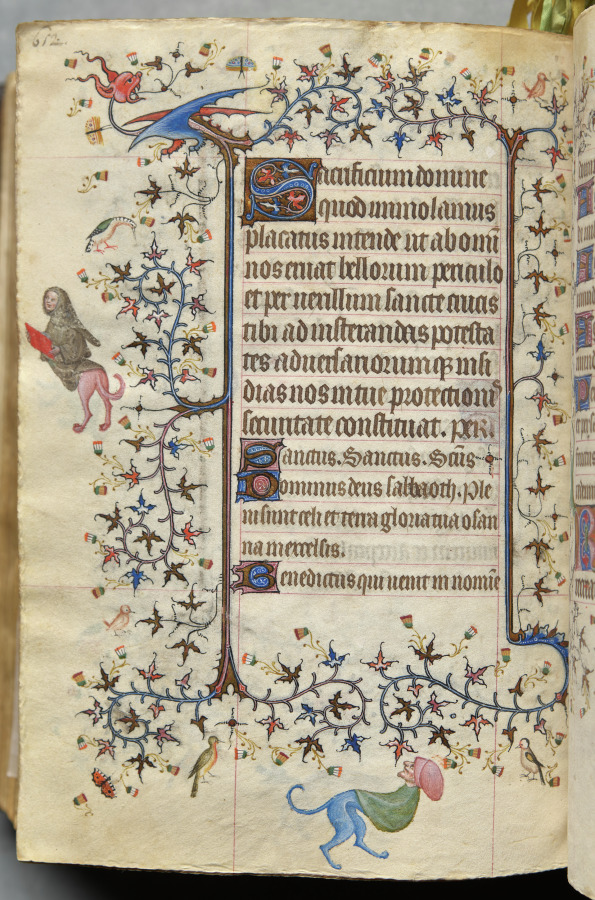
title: Hours of Charles the Noble, King of Navarre (1361-1425), fol. 320v, Text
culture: France, Paris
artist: Master of the Brussels Initials and Associates (French)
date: c. 1405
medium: ink, tempera, and gold on vellum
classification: Bound Volume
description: This precious volume was obviously highly prized by its owner, the French-born King of Navarre, who had his coat of arms painted on no less than twenty folios. Rather than directly commissioning this manuscript from a specific workshop, it seems that Charles the Noble acquired his book of hours -- perhaps ready-made for the luxury market -- while on a trip to Paris in 1404-05. A collaborative effort, six painting styles are evidenced within the pages of this codex, those of two Italians, two Frenchmen, and two Netherlanders. The painter who was responsible for the planning and decoration of the book, and who produced seventeen of the large miniatures, was a Bolognese artist known as the Master of the Brussels Initials. His principal assistant, responsible for most of the borders, was a Florentine who signed his name "Zecho" da Firenze on folio 208 verso.